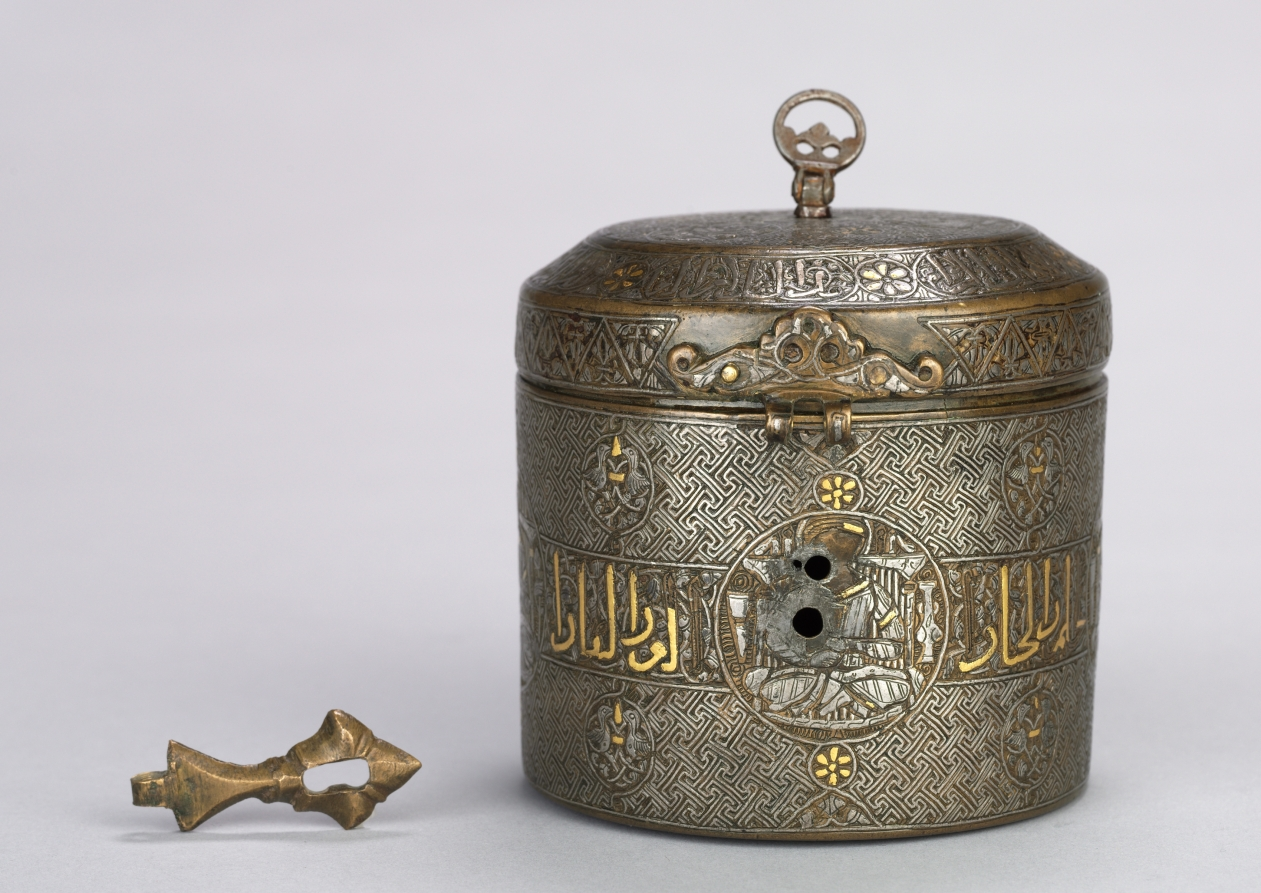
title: Luxury Inlaid Container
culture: Northern Iraq, Ayyubid period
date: c. 1250–1350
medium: sheet brass, inlaid with silver and gold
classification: Metalwork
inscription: Band around body (naskh): "Lasting glory, and safe life, and increasing prosperity, [and] nobility, [and] effective authority"; band around body (naskh): "Brilliance, and nobility, and patience, and modesty, and glory, and long life, and piety, and patience"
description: Metalwork flourished in the 1200s with production centers in Mosul, Damascus, and eastern Anatolia. Along with this container, the nearby ewer and candlestick are examples of the superb pieces produced at this time. Scenes of court life, including banqueting, music, and enthroned figures, decorate the sides and top of the container. The lid is covered in hexagonal swastikas, an ancient solar motif, which is further enhanced by a large sunburst in the center. The calligraphic inscriptions extend wishes for a long life, prosperity, and patience to the owner.